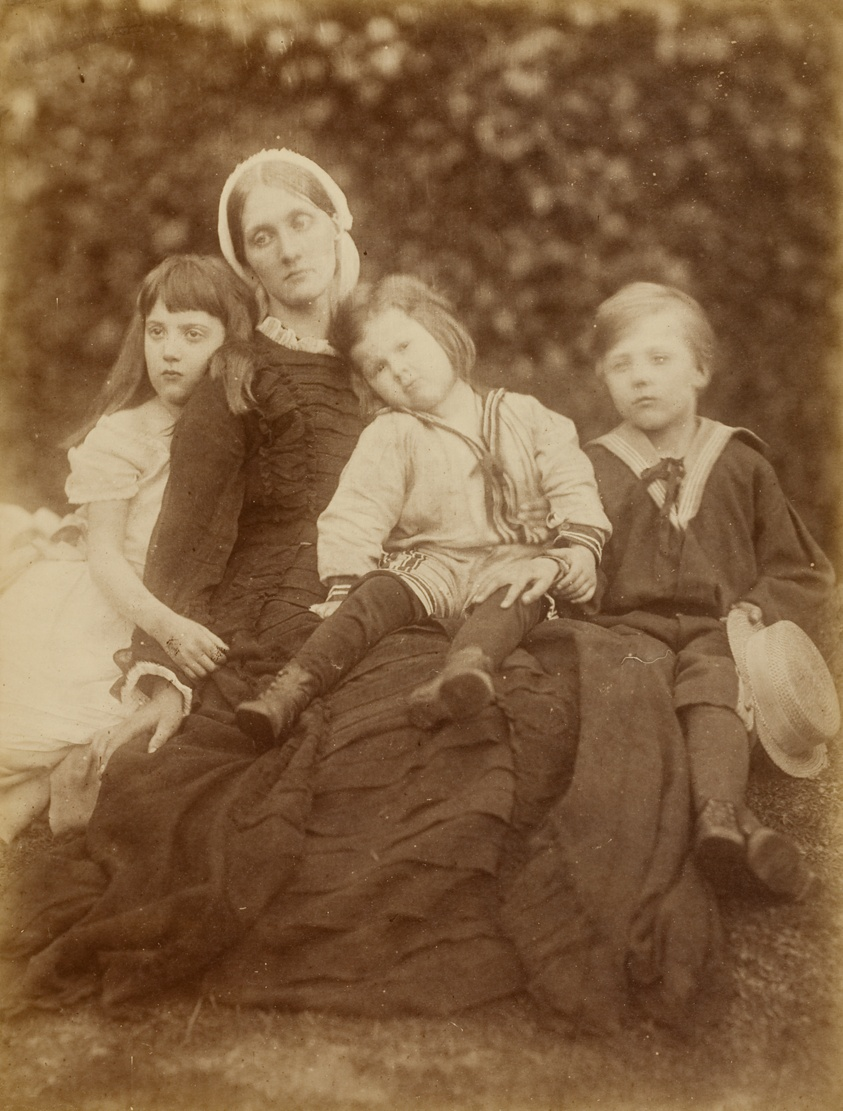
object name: Photograph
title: Mrs. Herbert Duckworth with Florence Fisher, George Duckworth, and Herbert Fisher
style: 19th century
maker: Julia Margaret Cameron (English, 1815–1879)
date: August 1872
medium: Albumen print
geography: England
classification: albumen silver print; photographic process; photography; photograph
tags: Collected by Hugh Edwards